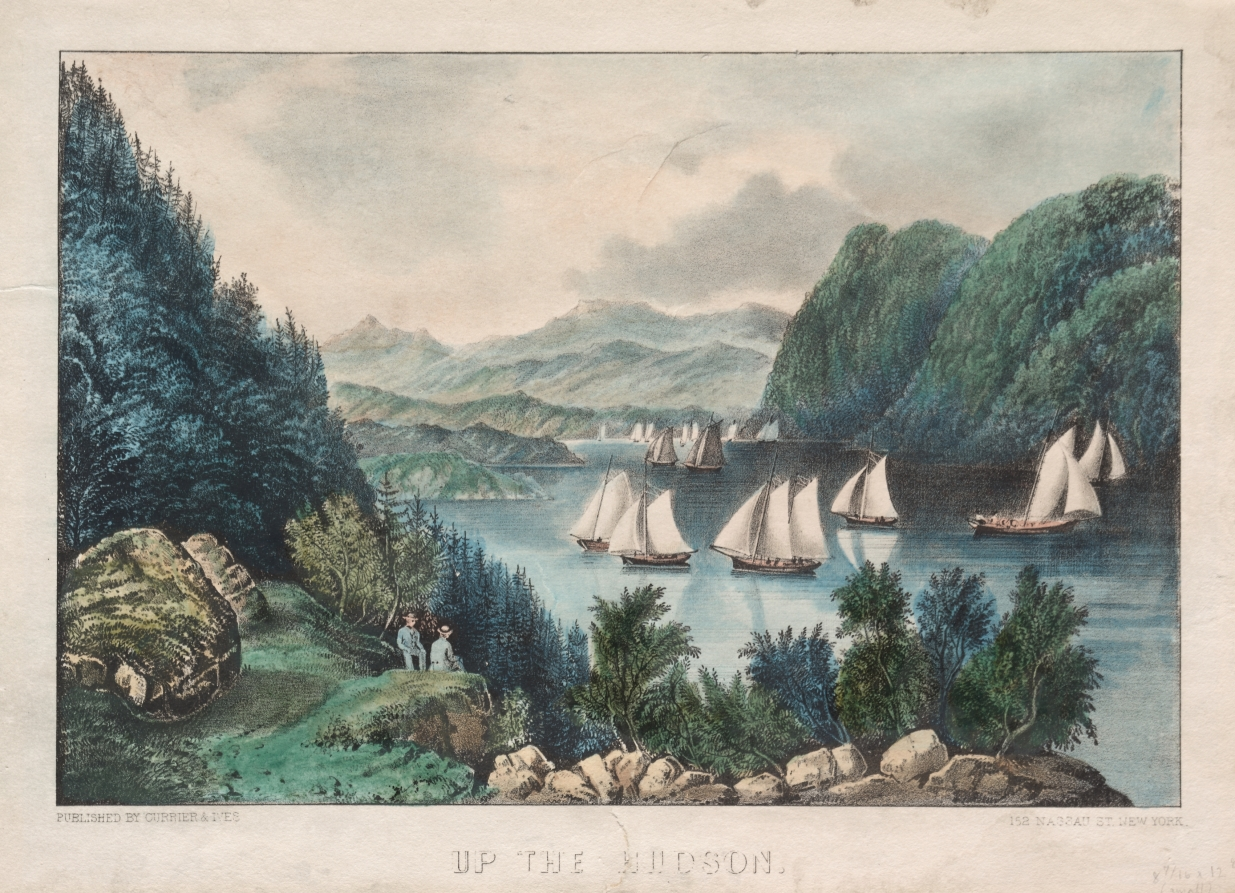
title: Up the Hudson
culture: America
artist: and James Merritt Ives (American, 1824–1895)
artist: Nathaniel Currier (American, 1813–1888)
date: c. 1857–72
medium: lithograph, hand colored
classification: Print